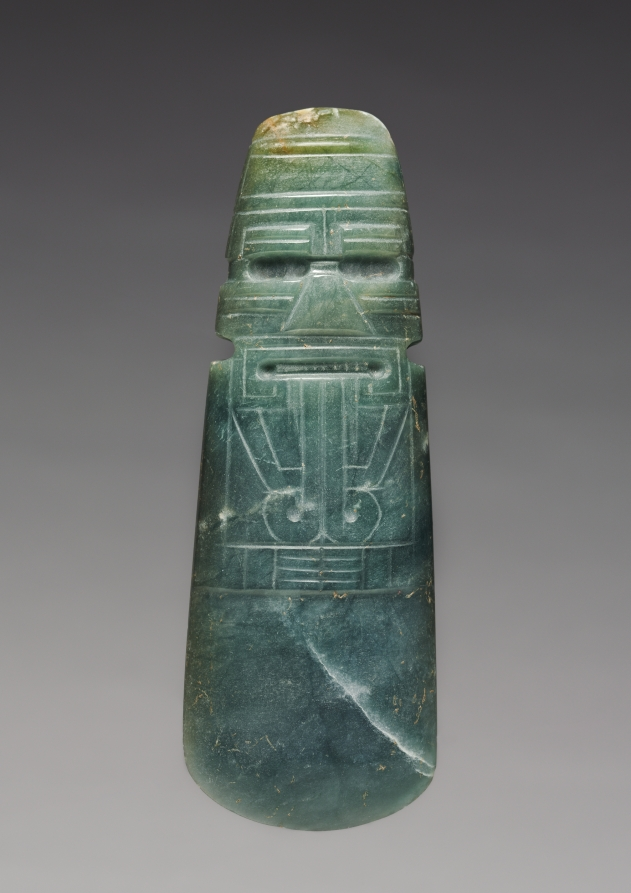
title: Celt-Shaped Pendant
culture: Costa Rica, Southern Nicoya region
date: c. 300 BCE–600 CE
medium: jadeite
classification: Jewelry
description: Costa Rican jade pendants may imitate the shape of axe blades (celts) used for agriculture. The pendants often take the form of "axe gods," creatures with human, bird, or animal traits. Jade carving was common in Costa Rica before ad 500, but then declined in importance. Gold eventually replaced jade as the region’s preferred luxury material.